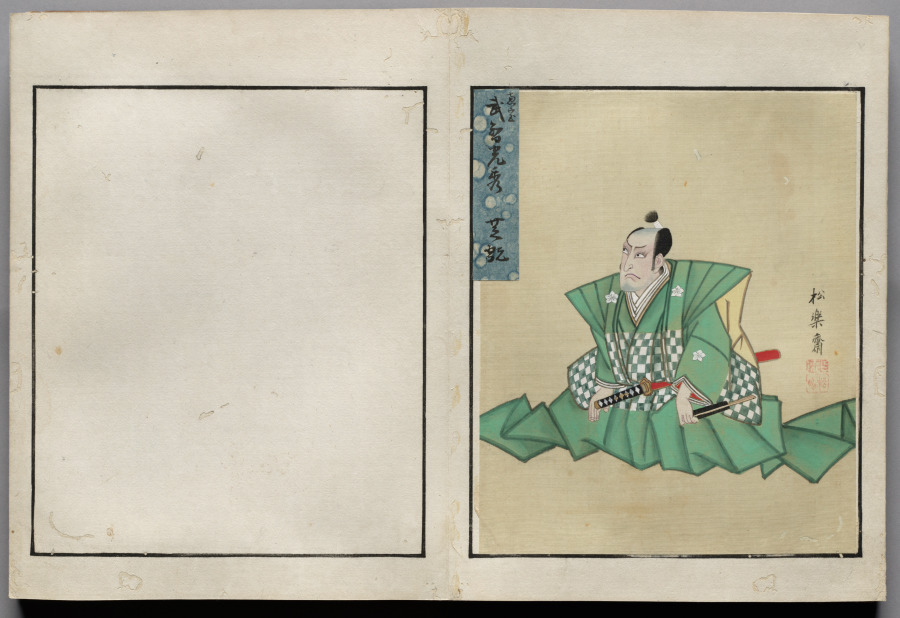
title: Double-Leaf from Album of Actor Portraits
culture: Japan, Edo period (1615–1868)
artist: Shōrakusai (Japanese)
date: c. 1790–1810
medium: double-leaf from an accordion-style album; ink and color on silk (right)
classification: Bound Volume